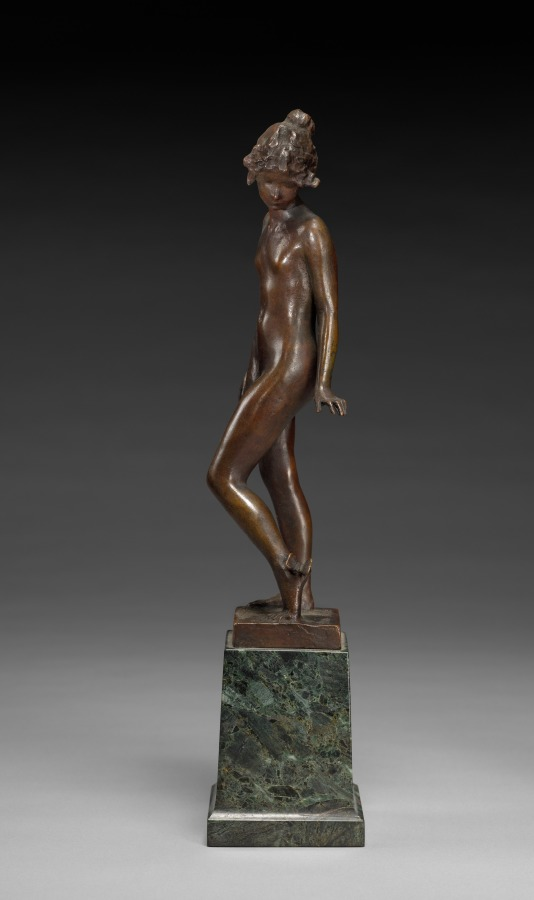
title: Butterfly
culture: America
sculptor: Emil Fuchs (American, born Austria, 1866–1929)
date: c. 1919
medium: bronze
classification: Sculpture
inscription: Signed on base: EMIL FUCHS